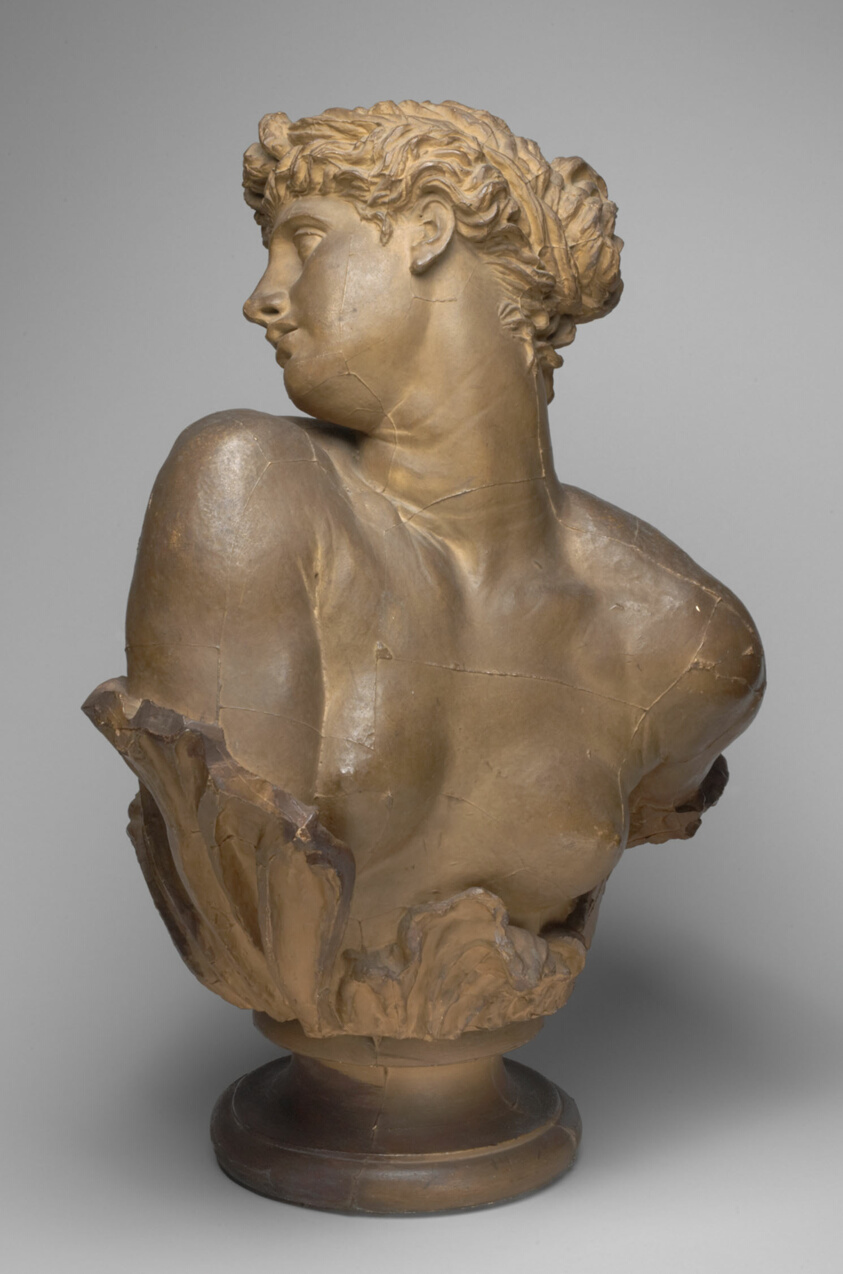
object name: Sculpture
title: Clytie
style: 19th century, nineteenth century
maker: George Frederick Watts (English, 1817–1904)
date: 1868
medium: Plaster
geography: England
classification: bust/head; sculpture; british; plaster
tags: Greek mythology, sunflowers, mythology, mythological figures, head, busts, woman